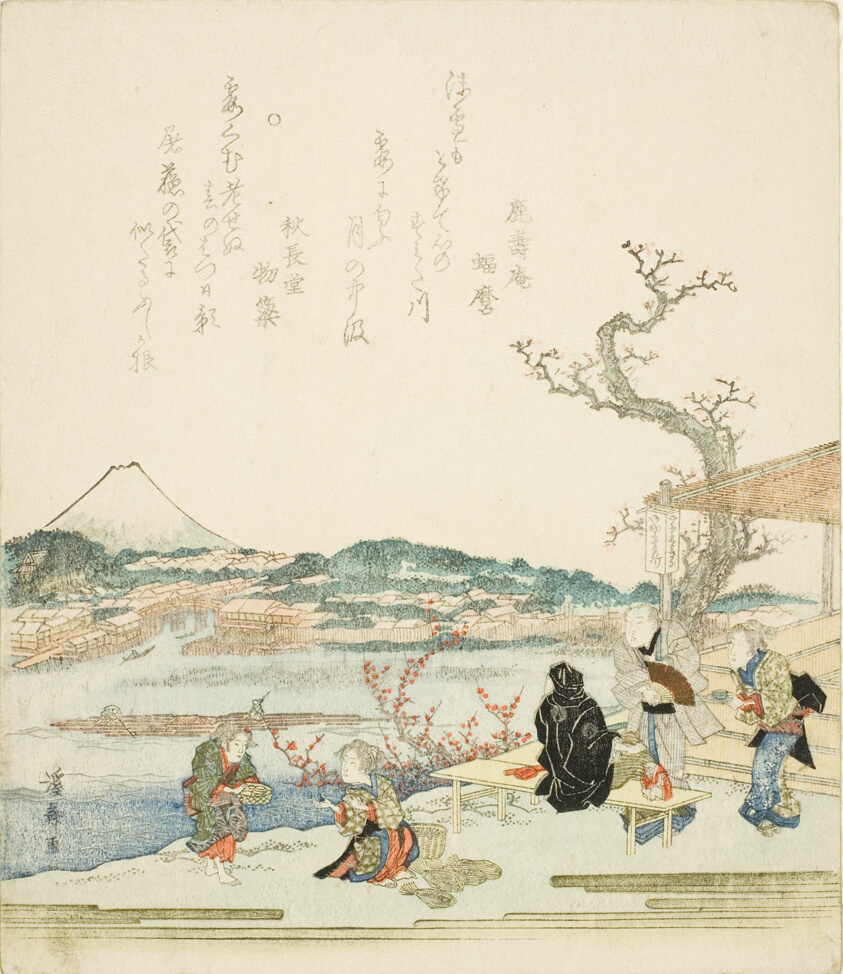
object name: Print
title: View of Mount Fuji from a tea house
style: Japanese (culture or style)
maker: Keisai Eisen (Japanese, 1790-1848)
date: c. 1820s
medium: Color woodblock print with metallic pigments; shikishiban, surimono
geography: Japan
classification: woodblock print; print; asian art